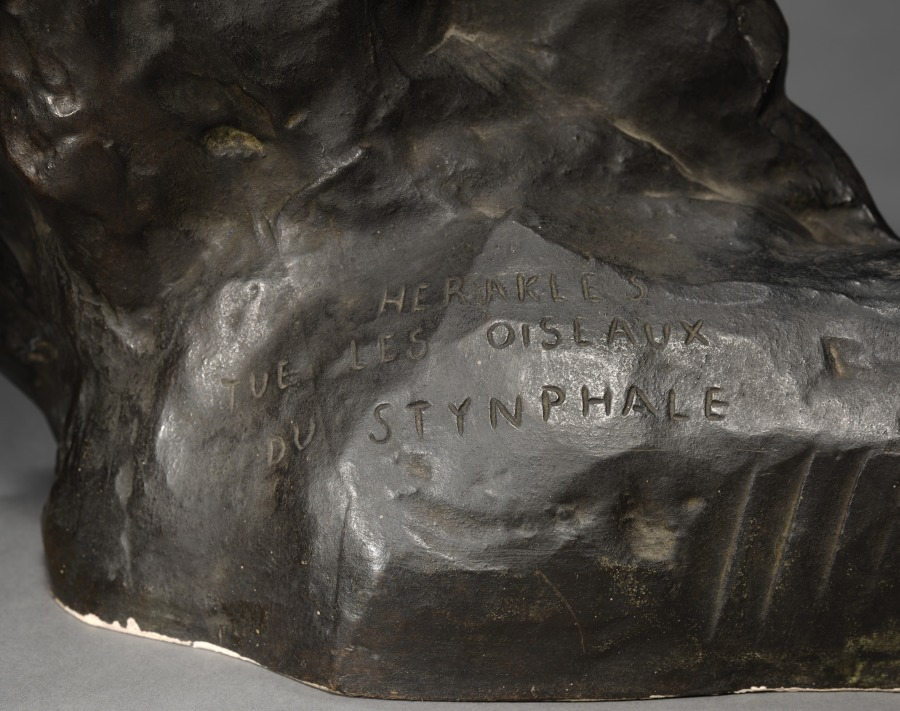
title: Herakles the Archer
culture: France, 19th century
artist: Emile Antoine Bourdelle (French, 1861–1929)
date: 1908–9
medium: bronze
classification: Sculpture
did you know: The model who posed for this sculpture was Major Paul Gustave André Doyen-Parigot, an accomplished sportsman and military commander, who was later killed during World War I in the Battle of Verdun.